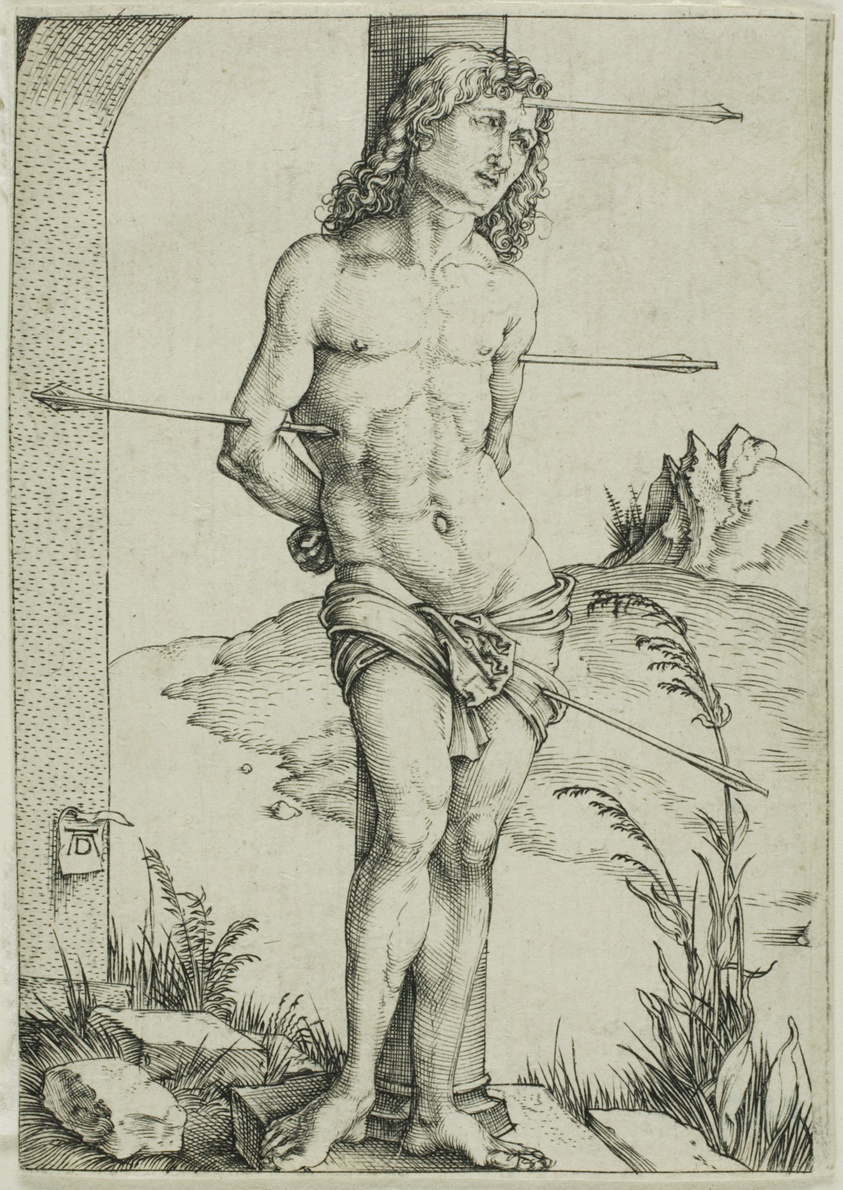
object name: Print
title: St. Sebastian Bound to the Column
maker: Albrecht Dürer (German, 1471-1528)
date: c. 1499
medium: Engraving in black on ivory laid paper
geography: Germany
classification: engraving; print; prints and drawing; paper